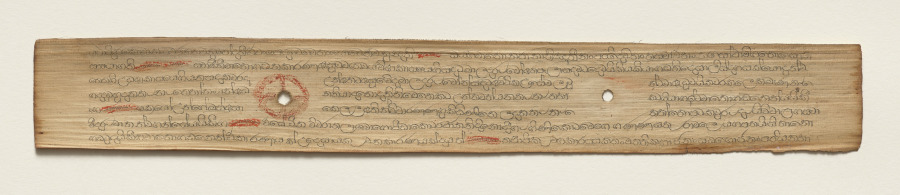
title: Leaf from a Buddhist Manuscript (verso)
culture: Sri Lanka, Singhalese, Late 17th century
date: c. 1700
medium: fiber paper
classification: Manuscript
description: Palm leaf material is still used for manuscripts in Sri Lanka. The palm leaves are prepared first by boiling them, drying them in the sun, and then rubbing them with oils. Scribes then use a metal stylus to incise the text. Then charcoal powder is wiped across the pages, filling in only the inscribed lines.